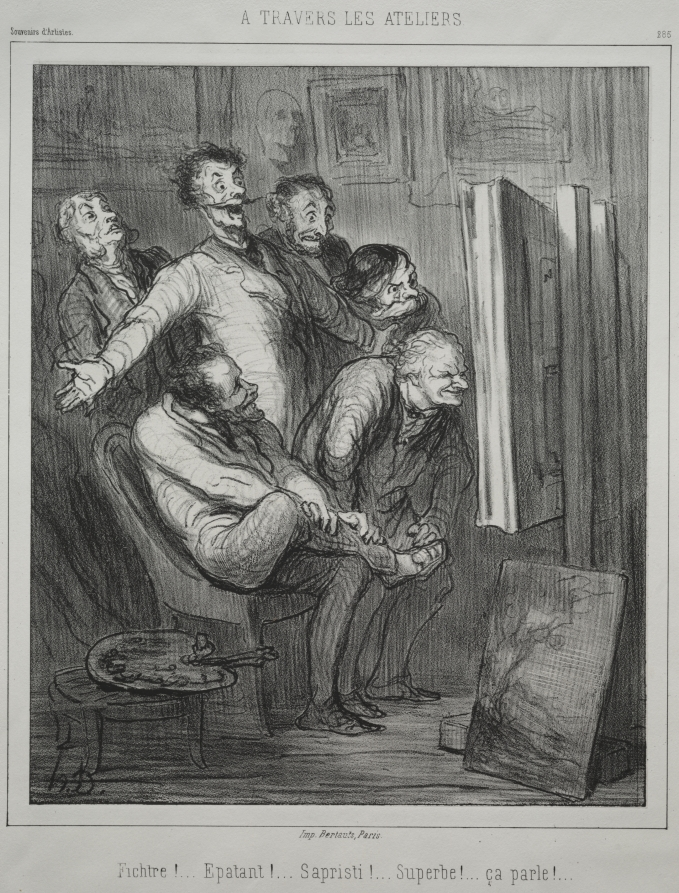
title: Around the Studios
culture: France, 19th century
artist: Honoré Daumier (French, 1808–1879)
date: 1862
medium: lithograph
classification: Print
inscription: Upper margin, printed: A TRAVERS LES ATELIERS. ; Below image, printed: Fichtre!.... Epatant!... Sapristi!... Superbe!... ça parle!...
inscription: Upper margin, printed: Souvenirs d'Artistes. / 285. ; Lower margin, printed: Imp. Bertauts, Paris. ; Lower margin, in pencil: 108 / H.D. 241 onlys state / 10146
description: This print was published both in the journal Le Boulevard (April 20, 1862) and in the album Souvenirs d’Artistes (plate 285).